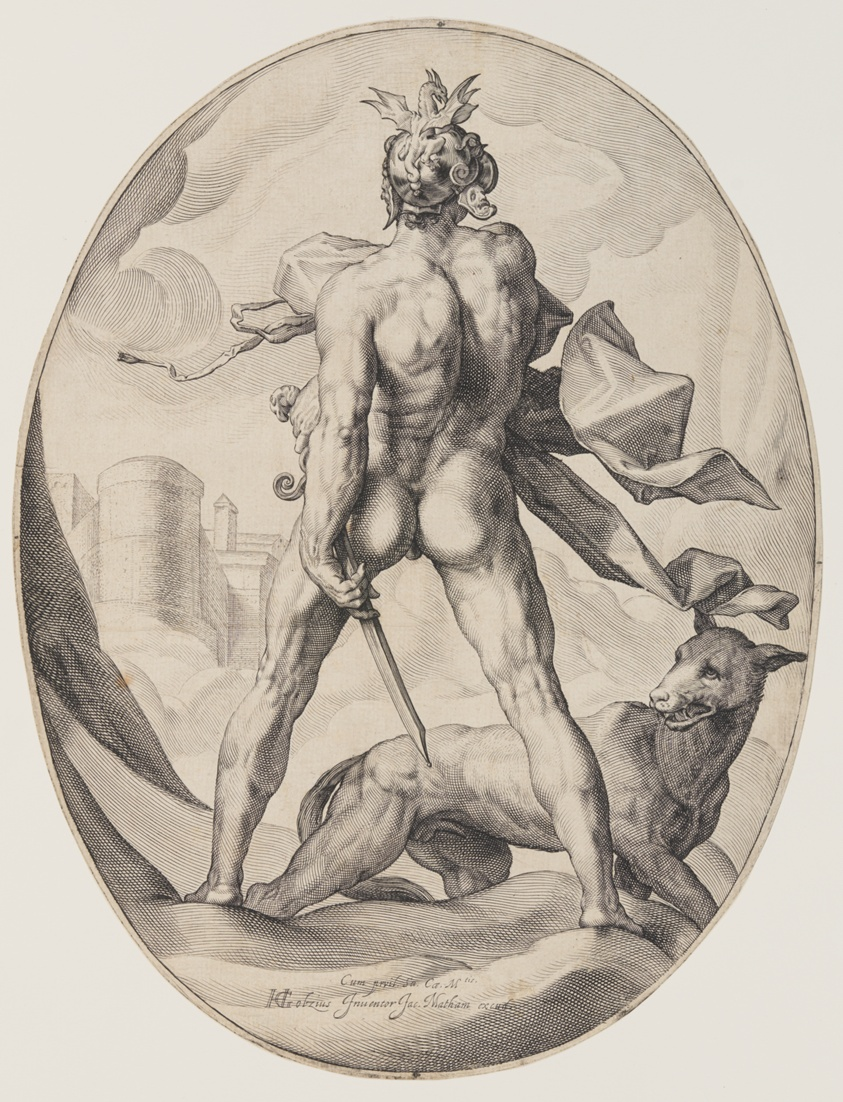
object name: Print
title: Mars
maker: Jacob Matham (Dutch, 1571–1631); after Hendrick Goltzius (Dutch, 1558–1617)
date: c. 1590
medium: Engraving on ivory laid paper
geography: Netherlands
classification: print; paper; prints and drawing; engraving